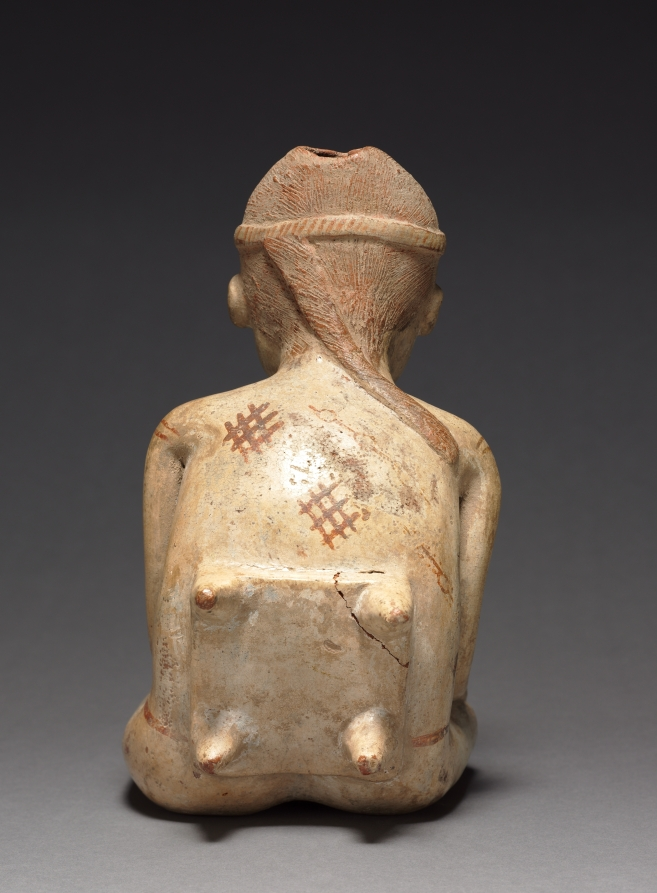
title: Seated Male Figure with Backrest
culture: Mexico, Nayarit, Chinesco style, Type E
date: 100 BCE–300 CE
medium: pottery with burnished cream and red slips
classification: Sculpture